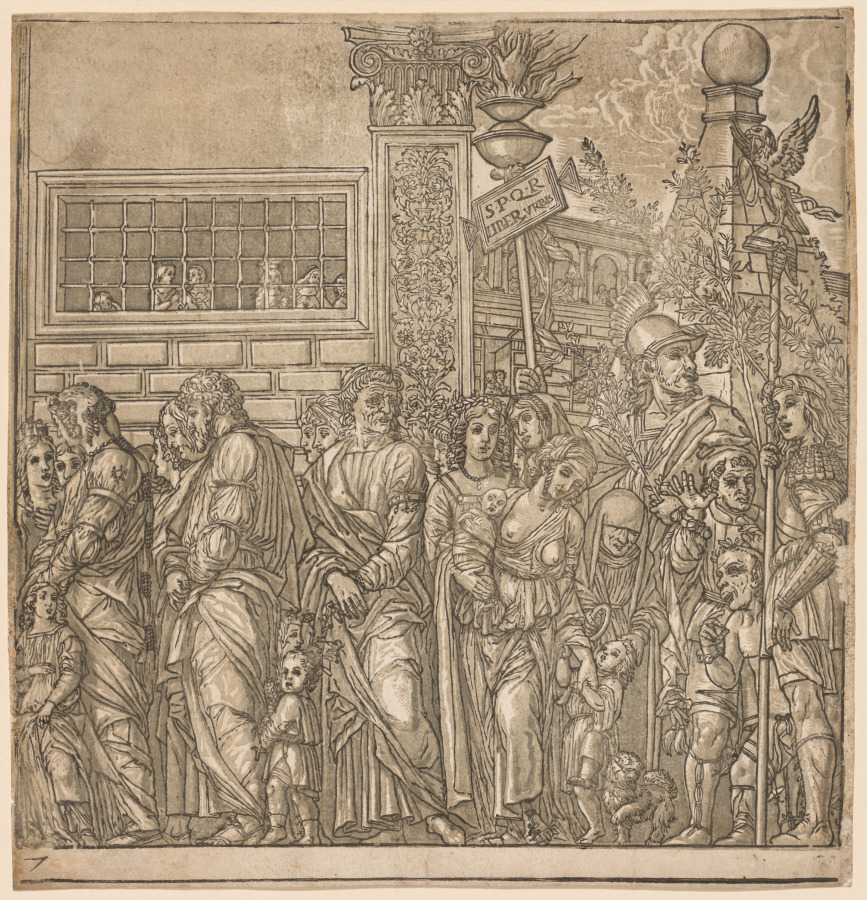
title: The Triumph of Julius Caesar: Procession of Men, Women and Children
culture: Italy, 16th century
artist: Andrea Andreani (Italian, about 1558–1610)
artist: after Andrea Mantegna (Italian, about 1431–1506)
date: 1593–99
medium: chiaroscuro woodcut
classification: Print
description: Commissioned by Duke Vincenzo Gonzaga, this series of chiaroscuro woodcuts reproduces Andrea Mantegna’s Triumph of Julius Caesar, painted a century earlier. The scenes imaginatively portray the triumphal procession of the renowned Roman general and consul Julius Caesar following his successful defeat of Gaul in 52 BC. Each section of the continuous frieze shows elements typical of these parades, sanctioned by the Roman Senate and described in ancient texts. The printed suite’s frontispiece features a portrait bust of Mantegna, and the text below boasts that the famous paintings attracted many viewers. People who owned sets of these woodcuts often tacked them up to create a decorative frieze. Andreani issued the prints with a sheet of classical columns that could be cut out and placed between the scenes. Two fragments of these columns, colored orange, still flank the fourth scene.